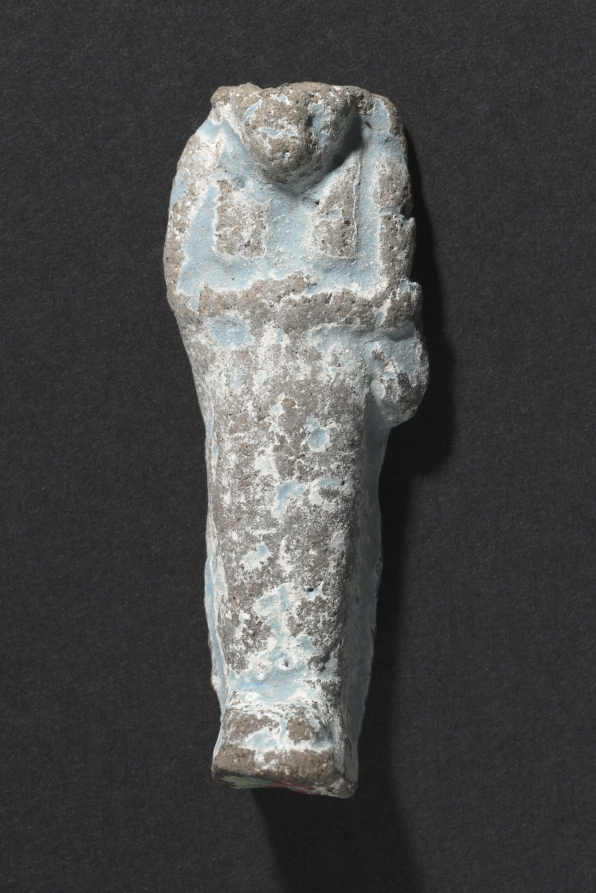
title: Shawabty of Ditamenpaankh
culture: Egypt, Late period (715–332 BCE), Dynasty 25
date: 715–656 BCE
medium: terracotta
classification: Funerary Equipment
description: High demand for shawabtys in the Late Period, a time when as many as 400 or more shawabtys were placed in the tomb with the deceased, gave rise to a specialized container for storing them: the shawabty box. This example is inscribed for the lady of the house, Ditamenpaankh, and was probably one of a pair originally made for her. The single-masted boat on the box's lid is perhaps an allusion to the pilgrimage of the deceased to the holy city of Abydos, the cult city of Osiris, king of the dead. The shawabtys inside are crude, mass-produced examples cast in an open mold. Made of terracotta, their blue paint imitates more costly shawabtys made of faience. As for the shawabty spell, it has been removed from its traditional location on the shawabty's front and relocated onto the sides of box, where it needed only to be written once, thus expediting production.